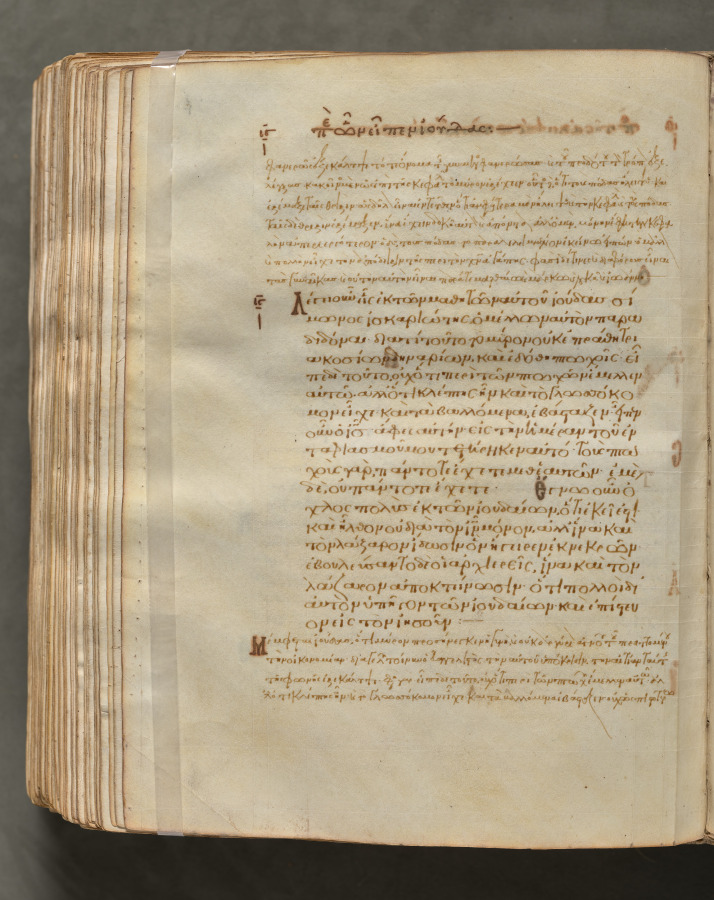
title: Text, folio 383 (recto), from a Gospel Book with Commentaries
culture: Byzantium, Constantinople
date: c. 1000–1100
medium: ink, tempera, and gold on vellum; leather binding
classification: Bound Volume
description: Each of the four gospels in this book opens on a page with brilliantly illuminated borders depicting the author of the text as well as birds—principally peacocks, symbols of the immortality of the soul—and fountains, representing the fountain of life and the salvation of the soul. This volume consists of 428 leaves with texts in Greek. Its level of sophistication suggests that it was probably written and decorated in a monastery in Constantinople.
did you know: Gospel books were carried in procession through Byzantine churches.